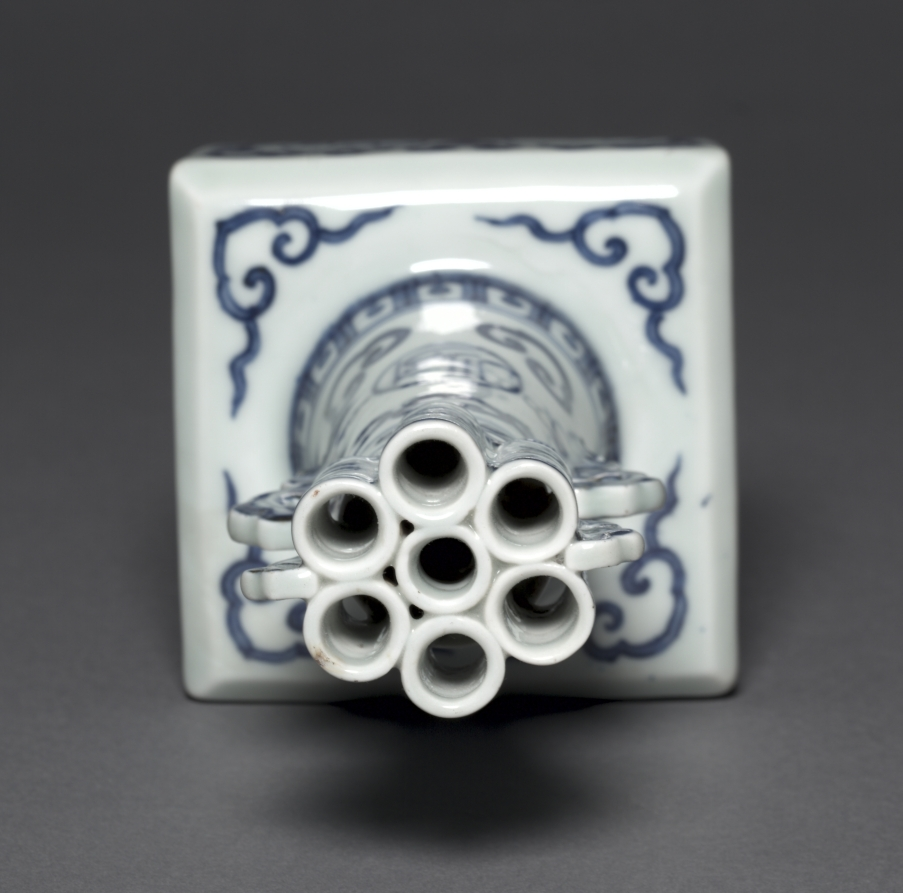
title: Arrow Vase with Persian Inscriptions and Floral Scrolls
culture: China, Jiangxi province, Jingdezhen kilns, Ming dynasty (1368-1644), Zhengde mark and reign (1505-1521)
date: 1506–21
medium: porcelain with underglaze cobalt blue decoration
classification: Ceramic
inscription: The two Persian inscriptions on the neck freely translated read 'Oh Beautiful! Oh Powerful'! Those around the body read 'None knows the extent and limits of Thy power and Majesty.'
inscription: 大明正德年製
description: Chinese potters in the 1500s integrated foreign motifs, shapes, and ideas in order to cater to changing tastes and new customers in an increasingly global world.